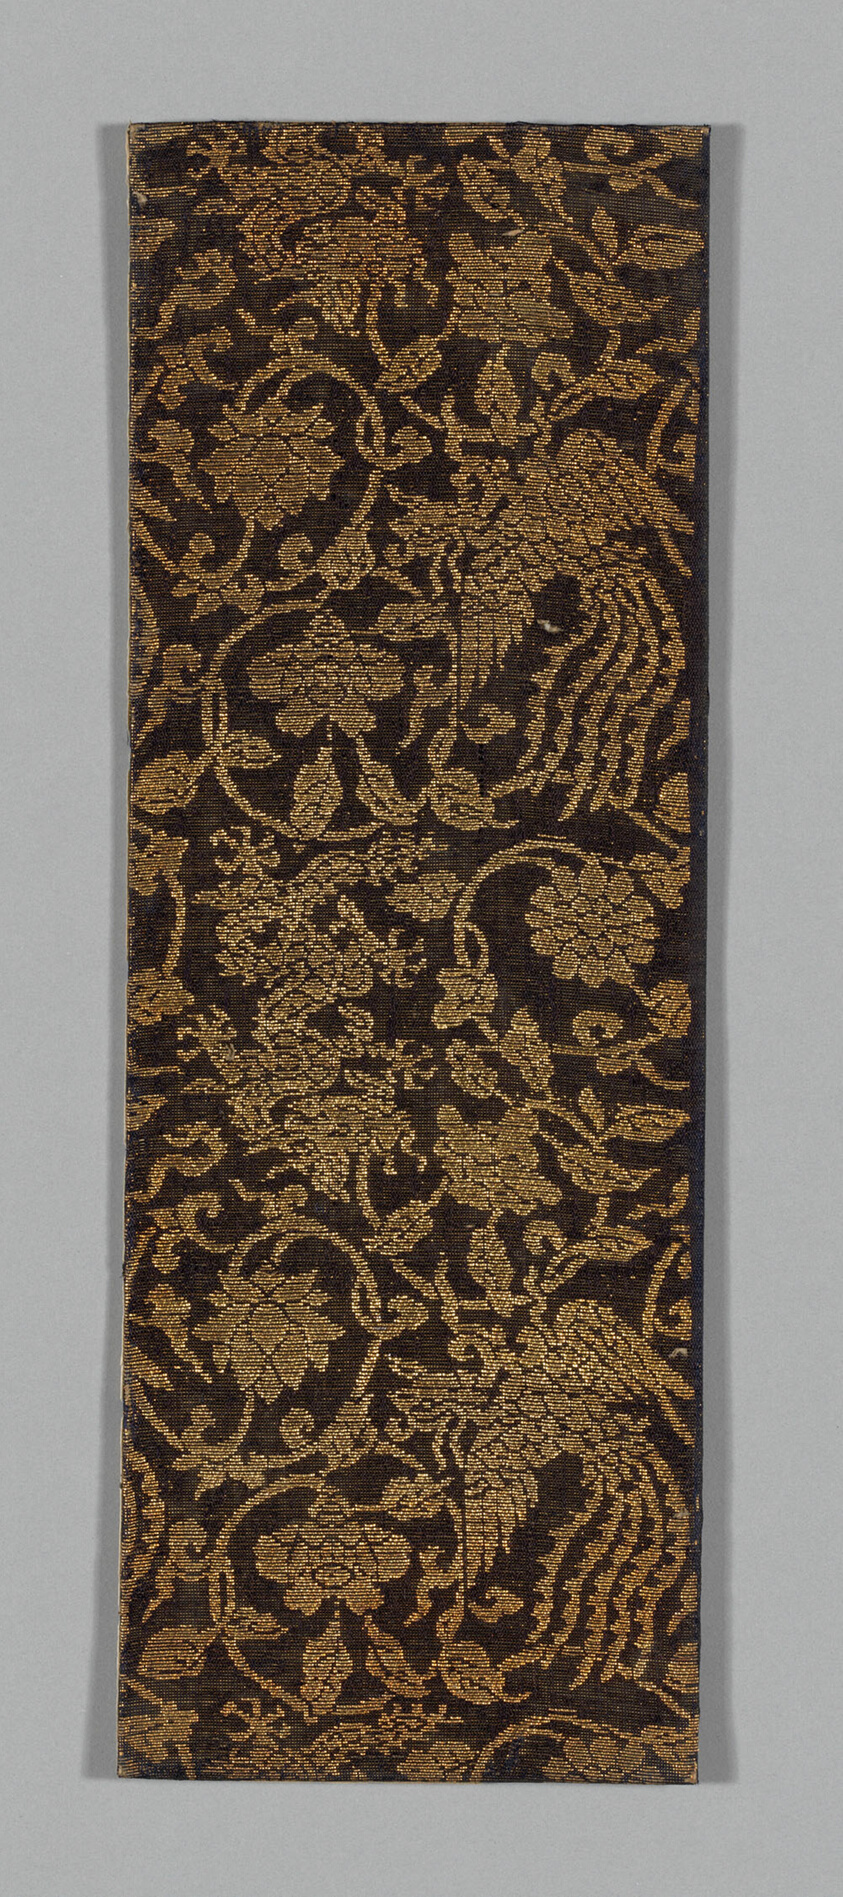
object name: Textile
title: Sutra Cover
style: ming, Chinese (culture or style), East Asian, asian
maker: China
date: Ming dynasty (1368–1644), c. 1590's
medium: Silk and gold-leaf-over-lacquered-paper strip, plain weave with supplementary patterning wefts bound in weft-float faced 1:3 'Z' twill interlacings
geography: China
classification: textile; weaving